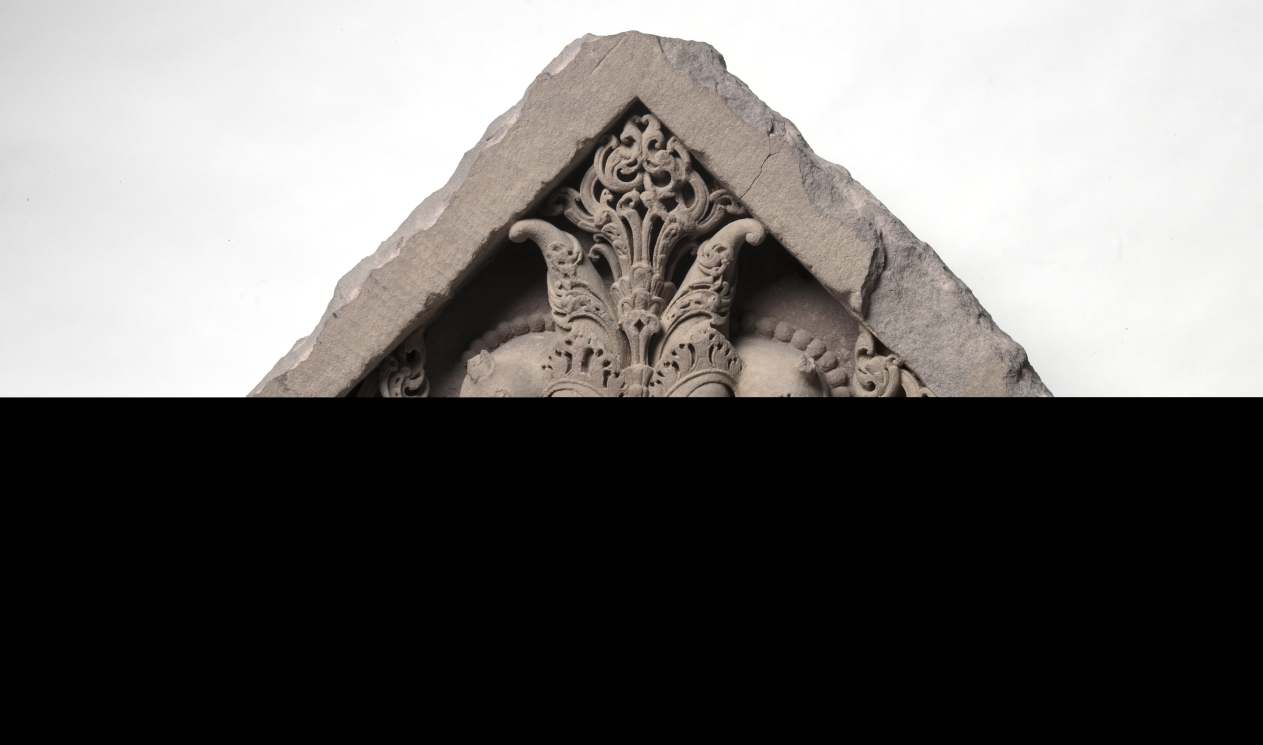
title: Pediment with the Face of Glory (Kirti-mukha)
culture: Northern India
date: c. 1000s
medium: sandstone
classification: Sculpture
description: Throughout India, sculptures of horned mythic beasts spewing stylized foliage were built into temples, above the entryways, in line with the sanctum. Known as the “face (mukha) of glory (kirti),” the protective mask emanates divine energy from the heart of the temple. The scrolling vegetation flowing from the mouth visually references the unending bounty and success that derives from worship and devotions.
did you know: Irises and pupils have been lightly incised into the bulging eyes.